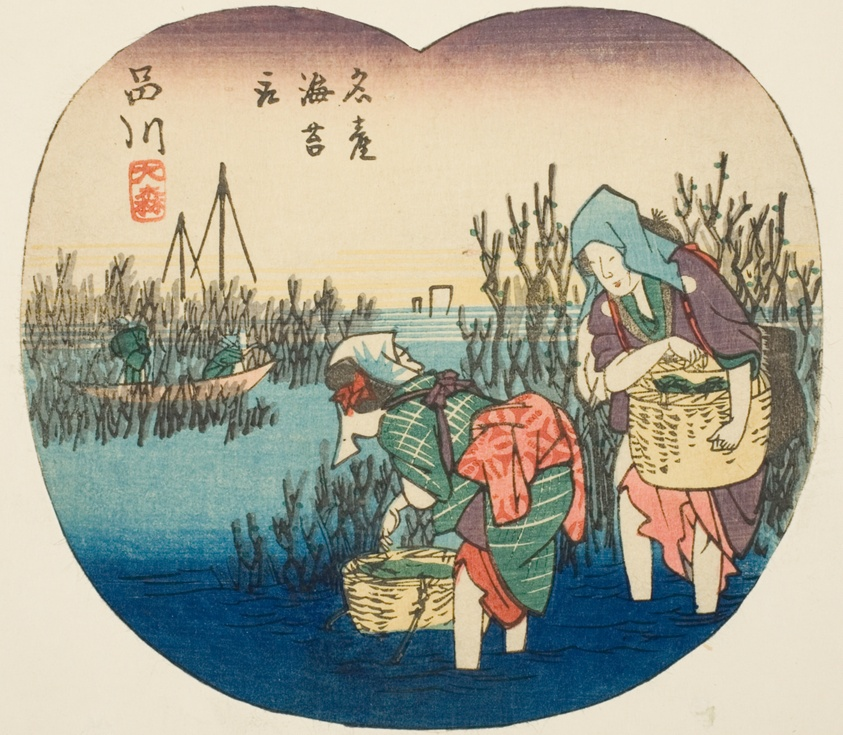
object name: Print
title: Gathering Seaweed at Omori in Shinagawa (Shinagawa, Omori, meisan nori tori), section of sheet no. 1 from the series "Cutout Pictures of the Tokaido Road (Tokaido harimaze zue)"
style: Japanese (culture or style)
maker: Utagawa Hiroshige 歌川 広重; Japanese, 1797-1858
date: c. 1848/52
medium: Color woodblock print; section of harimaze sheet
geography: Japan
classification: woodblock print; print; asian art